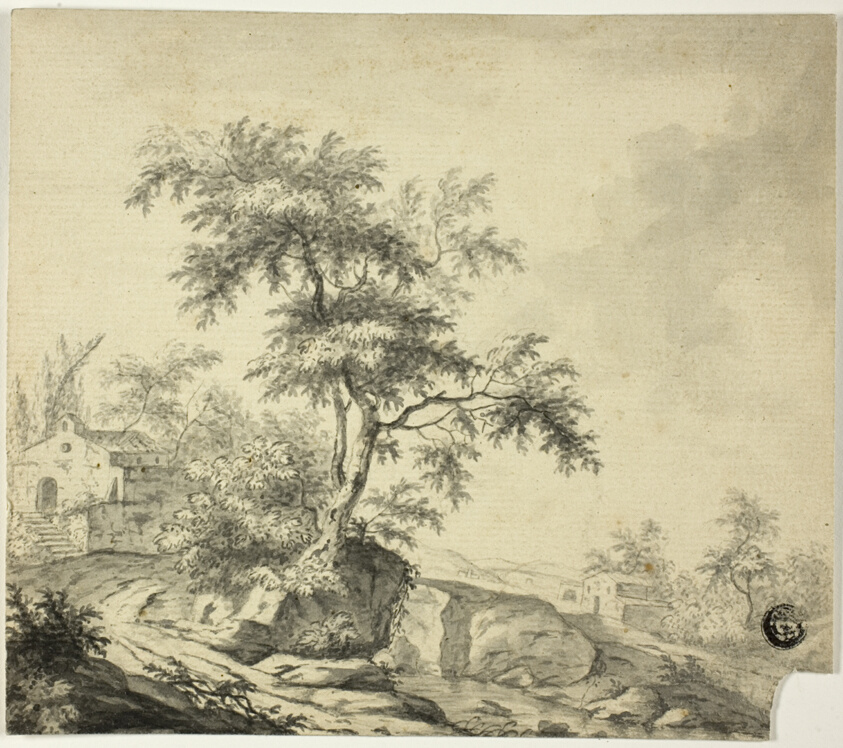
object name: Drawing and Watercolor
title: Landscape with Tree on Road to Buildings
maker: Possibly Jacob van Ruisdael; Dutch, 1628/29-1682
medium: Brush and gray wash, over graphite, on ivory laid paper, laid down on ivory laid paper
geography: Holland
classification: ink or chalk wash; drawings (visual works); prints and drawing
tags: landscapes